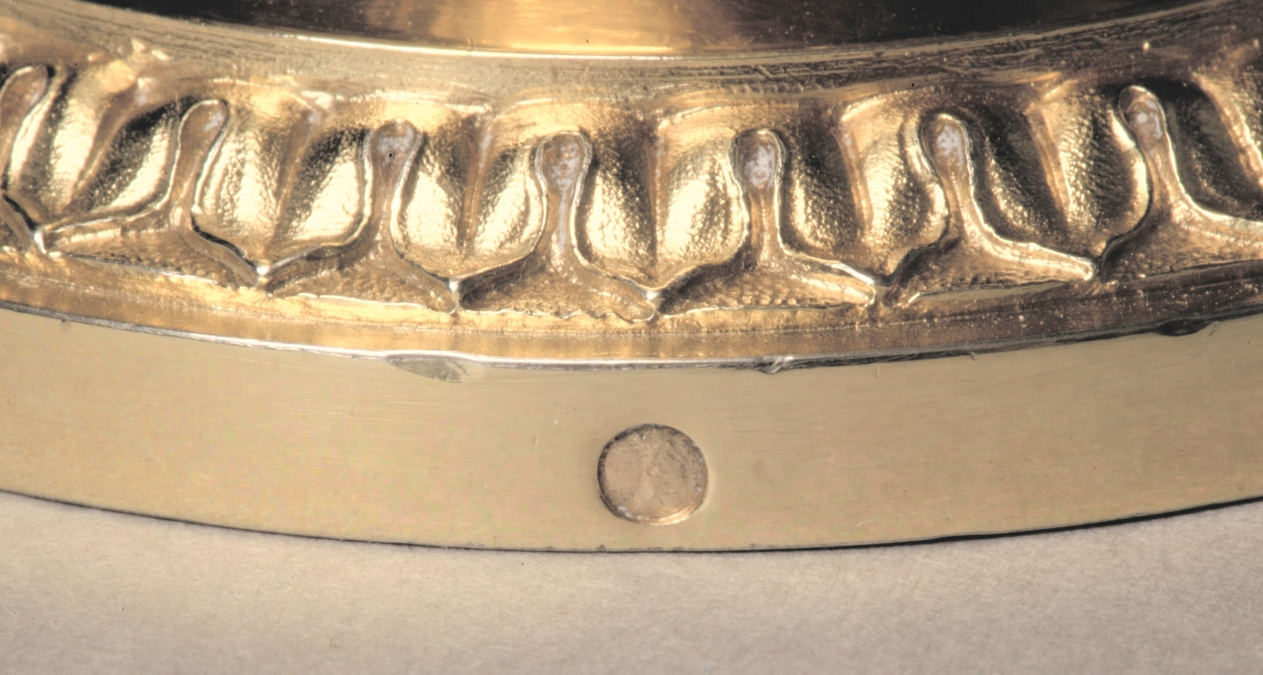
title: Ewer (aiguière)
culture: France, 19th century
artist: Jean Baptiste Claude Odiot (French)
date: c. 1817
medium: silver gilt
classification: Silver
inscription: [Excise mark for medium-sized work, Paris, 1809-1819, on edge of base]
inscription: [Two maker's marks of Jean-Baptiste-Claude Odiot after the Revolution, inside foot]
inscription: [Official assay mark for first standard silver, Paris, 1809-1819, near exterior upper rim]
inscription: [Applied coat of arms of the count Alfred de la Chapelle, Seigneur of Morton and Beaulieu, Périgord “accolé” with an alternate version of de la Chapelle, exterior of foot]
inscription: [Struck twice, interior foot]: "ODIOT"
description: Jean-Baptiste-Claude Odiot’s reputation stretched internationally. Commissioned by Russian count Nikolei Demidoff, this ewer was one part of an extensive silver dinner service. Decorated with motifs of classical antiquity, this object’s Greco-Roman silhouette, grape vine frieze, raised mythological figures, and sinuous swan’s neck handle were likely inspired by the designs of Charles Percier and Pierre-François Fontaine, architects of Napoleon I.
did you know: The coat of arms on the foot of this ewer belongs to the count Alfred de la Chapelle who owned this silver dinner service during the second half of the 19th century.